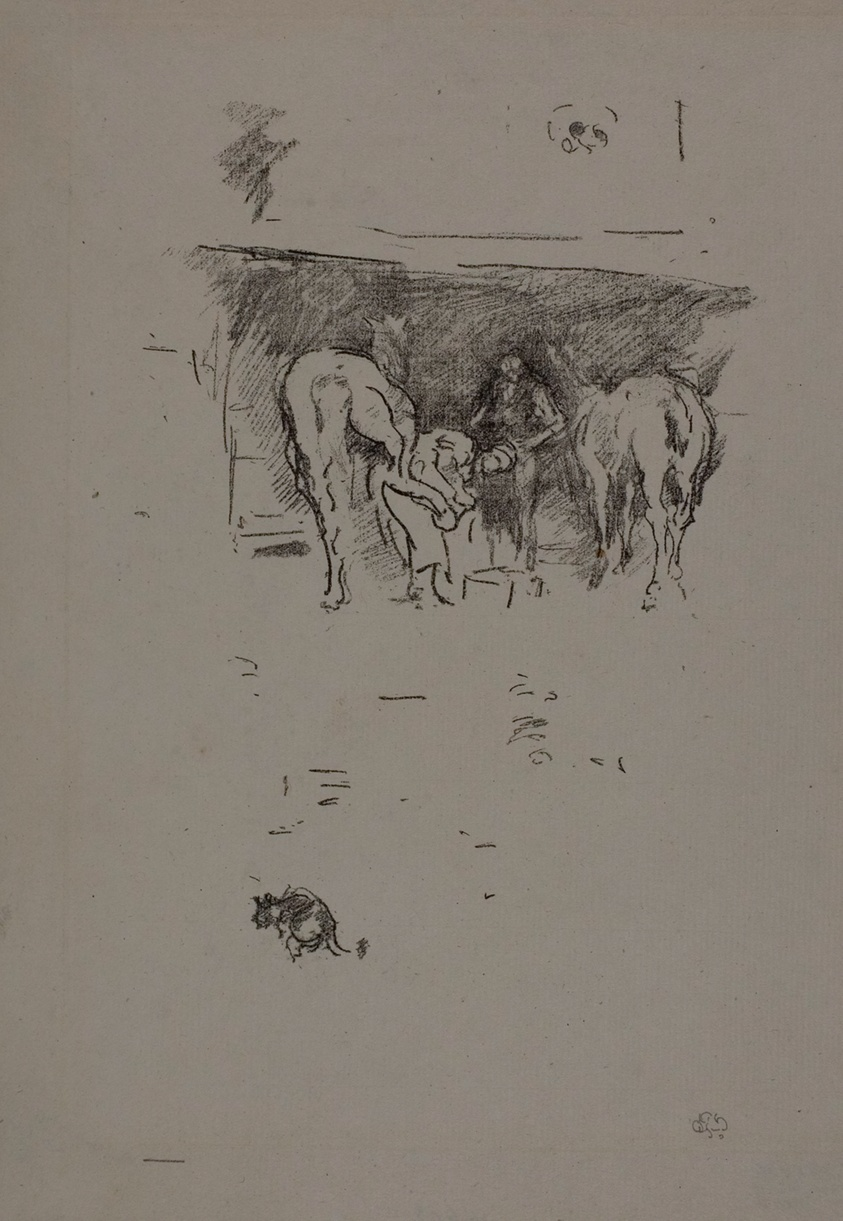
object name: Print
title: The Good Shoe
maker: James McNeill Whistler (American, 1834-1903)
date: 1895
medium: Transfer lithograph in black on ivory laid paper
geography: United States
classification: transfer lithograph; lithograph; print; prints and drawing; paper